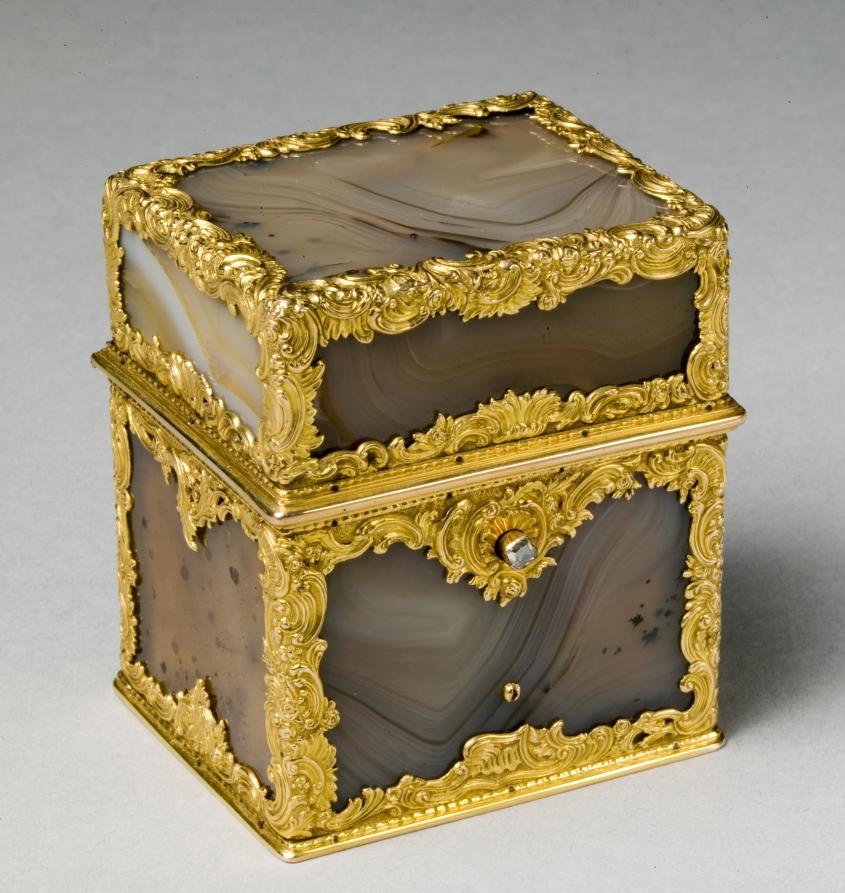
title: Writing Case (Nécessaire)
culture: England, mid 18th century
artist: attributed to James Cox (British)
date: c. 1760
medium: agate, gold and diamond. mounted with 18 KT gold cagework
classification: Miscellaneous